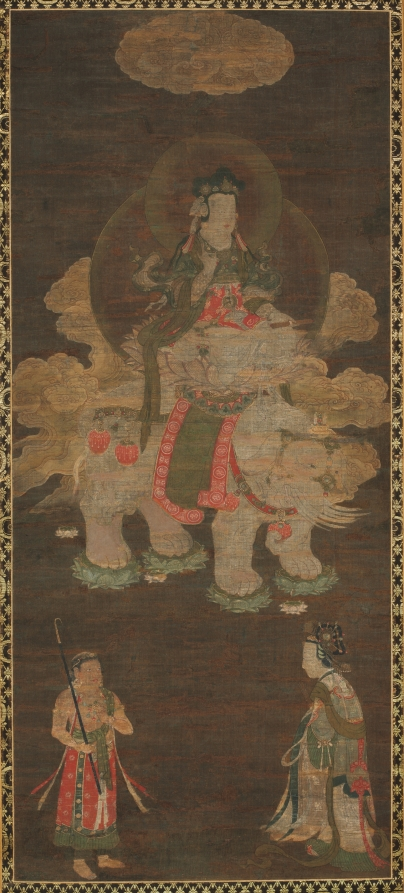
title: Shakyamuni Triad: Buddha Attended by Manjushri and Samantabhadra (Bodhisattva with Elephant)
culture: China, Fuzhou, Fujian Province, Yuan dynasty (1271-1368)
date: late 1300s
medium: Hanging scroll; ink and color on silk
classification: Painting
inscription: Inscription at the bottom of the central scroll reads: "Da Song Fuzhou fu…(Fuzhou prefecture of the great Song)."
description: This triptych is a rare example of Yuan Buddhist painting. It depicts the historic Buddha Shakyamuni flanked by two attending bodhisattvas, Manjushri (the bodhisattva of wisdom, riding a lion) and Samantabhadra (the bodhisattva of universal virtue, riding an elephant). Below them are others seeking enlightenment: two disciples of the Buddha (Ananada and Kasyapa), two non-Chinese people, a boy with topknots, and a female worshiper. The clouds above and around the divine beings form one scene that illustrates Shakyamuni’s sermon from the Lotus Sutra. This text became an important basis for Buddhist faith throughout East Asia and was central to the Mahayana school of Buddhism.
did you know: Samantabhadra, the bodhisattva of universal virtue, is mounted on a six-tusked white elephant standing on lotus flowers.